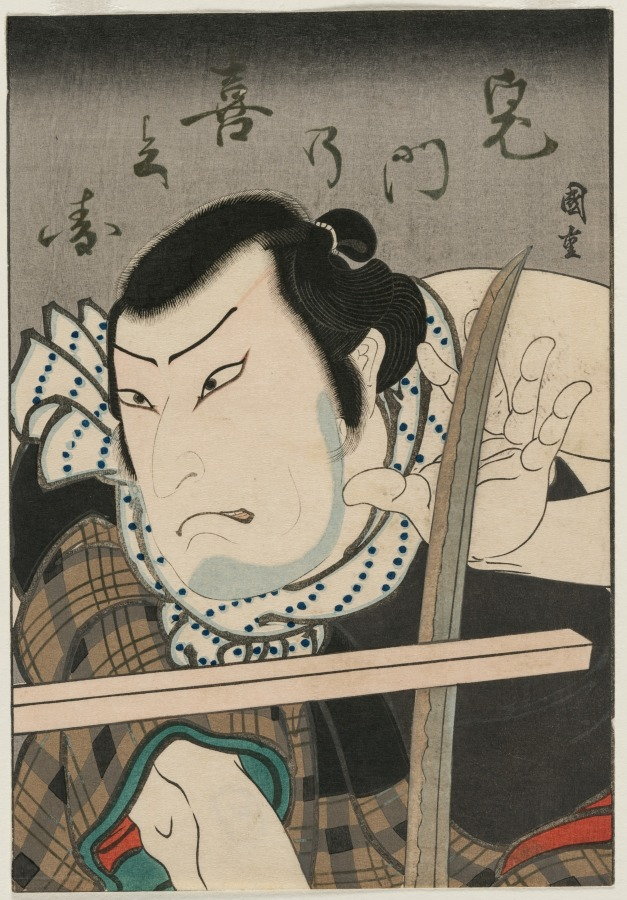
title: Actor as Kimon no Kihei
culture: Japan, Edo period (1615–1868)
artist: Ryūsai Shigeharu (Japanese)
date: before 1826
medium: color woodblock print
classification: Print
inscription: Signature: Kunishige